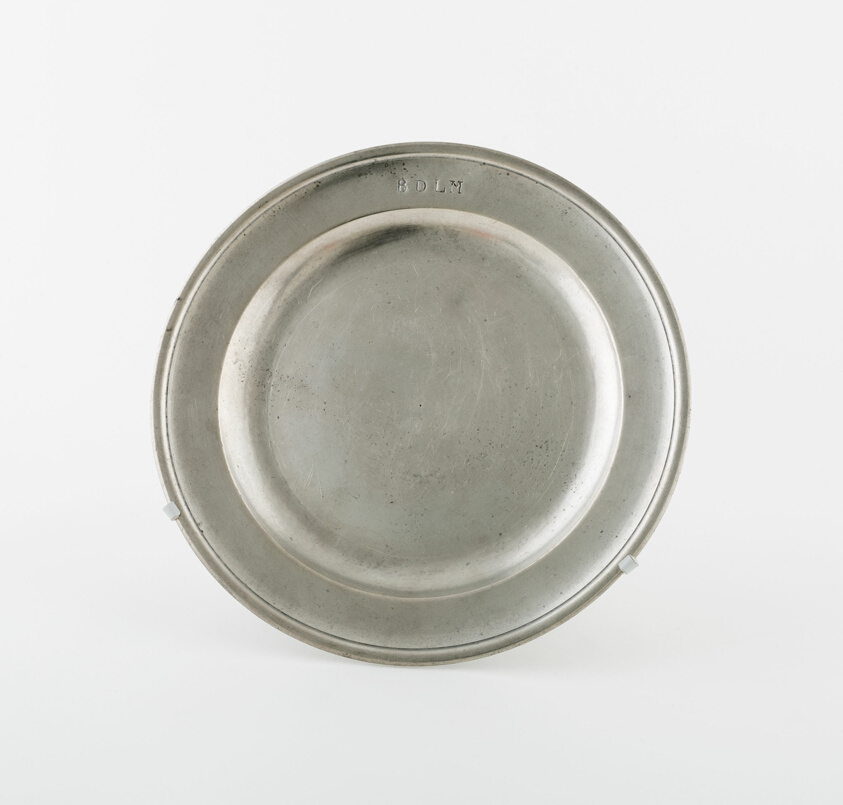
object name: Metalwork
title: Plate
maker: A. Carter; English, active 1740-1770; England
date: 1740/70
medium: Pewter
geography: England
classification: plate (general, dish); pewter; dish (vessel); metalwork; european decorative arts